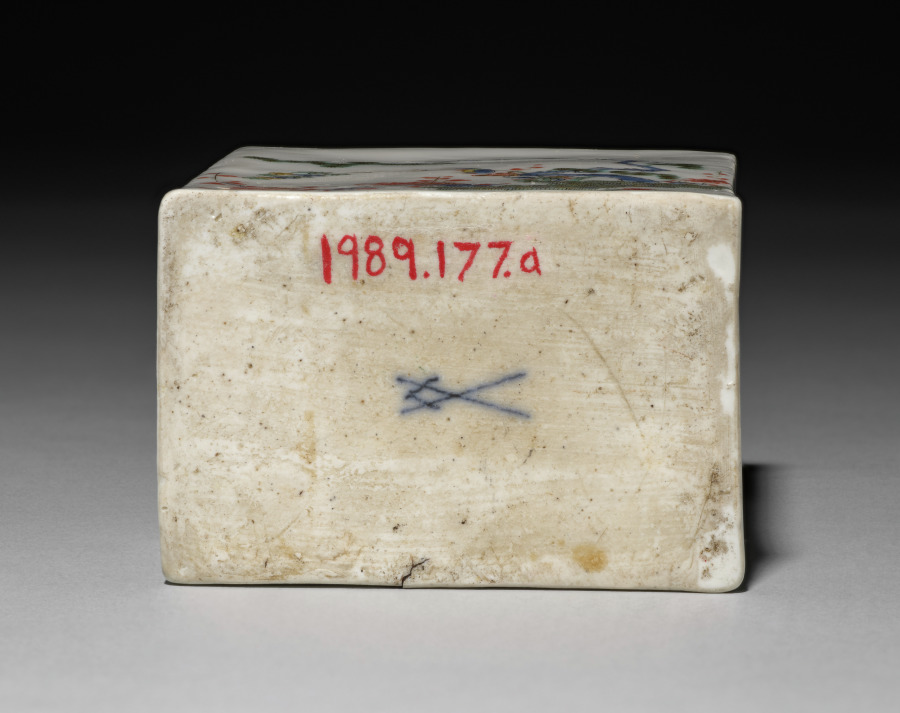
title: Tea Caddy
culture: Germany, Meissen, 18th century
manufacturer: Meissen Porcelain Factory (German, est. c. 1710)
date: c. 1735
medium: porcelain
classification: Ceramic